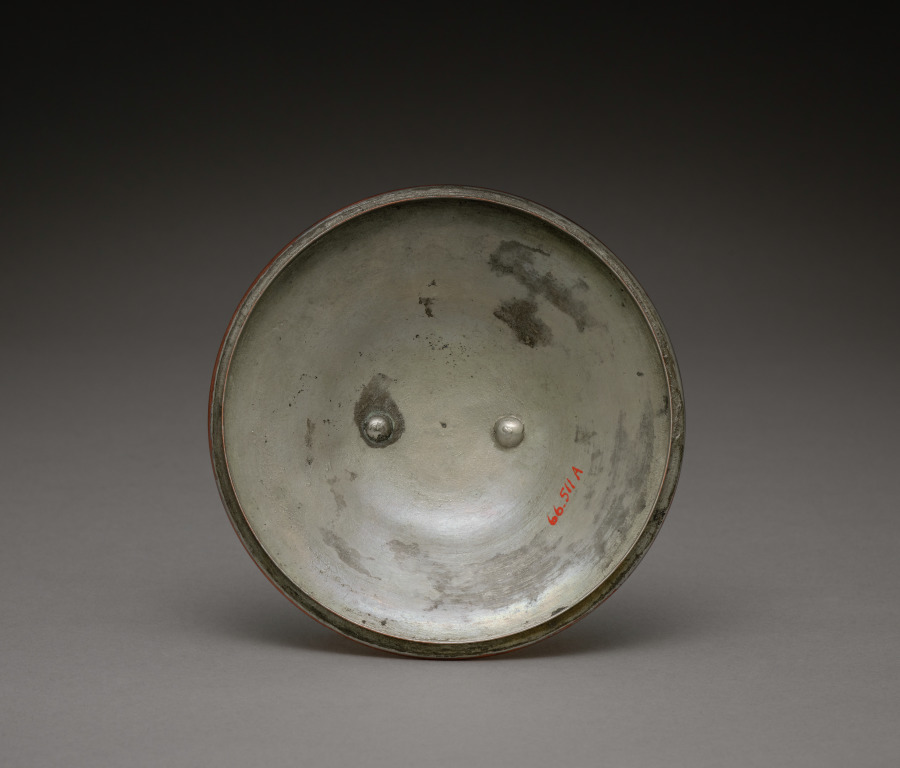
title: Cover for a Pot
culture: Russia, St. Petersburg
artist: firm of Peter Carl Fabergé (Russian, 1846–1920)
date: 1914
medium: copper with brass handles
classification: Metalwork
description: As Russia entered the First World War, austerity and economy settled into the fabric of life even among wealthy aristocrats and nobility. Not only were precious materials such as gold, silver, and gemstones hard to procure, but such luxury seemed out of place when so many men were dying at the front. Fabergé contributed to the war effort by making shells, casings, and other munitions out of brass and copper. He also made cookware, such as this small covered soup pot, to be sent to the front lines with provisions tucked inside. However, these simple forms only looked affordable. They were still a luxury only the wealthiest families could afford to send to their sons.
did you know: This lid is the cover for a copper soup pot that was sent to the front lines filled with provisions during the First World War.